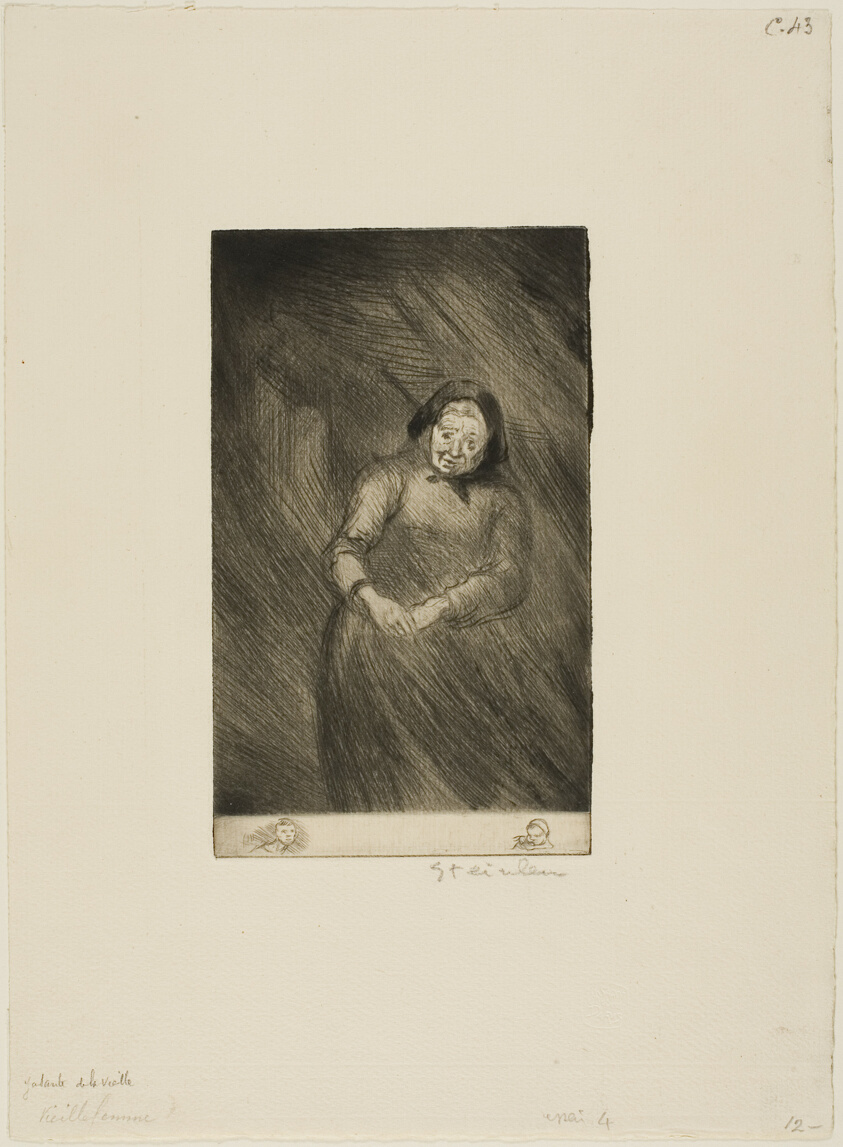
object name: Print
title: The Old Chatterer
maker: Théophile-Alexandre Steinlen; French, born Switzerland, 1859-1923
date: 1902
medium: Drypoint on ivory laid paper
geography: France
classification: drypoint; print; prints and drawing